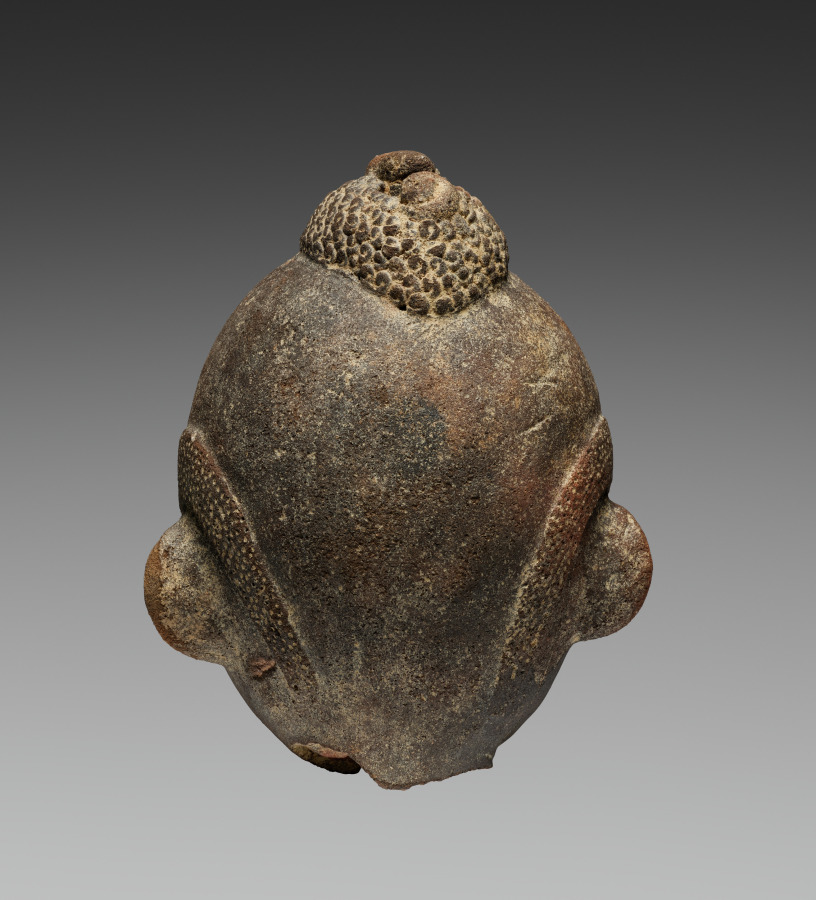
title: Memorial head (nsodie)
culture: Ghana, Akan-style sculpture, unknown female ceramicist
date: late 1600s–early 1700s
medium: Terracotta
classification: Sculpture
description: This is an idealized portrait of an Akan royal. The Akan states formed in West Africa around the 1400s. Akan royal family members commissioned terracotta portraits like this from female artists during someone’s life. Following their death and burial, the family placed these sculptures in a sacred grove. The woman who sculpted this head over 300 years ago worked from memory, without sketches. The resulting sculpture combined idealized physical qualities of elite figures with individual details. The hairstyle and skin color of this portrait reflect its subject’s individuality. In contrast, his calm expression reflects the desired “cool composure” of elites.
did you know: The woman who sculpted this head did so without making a sketch, working from her memory of the subject.